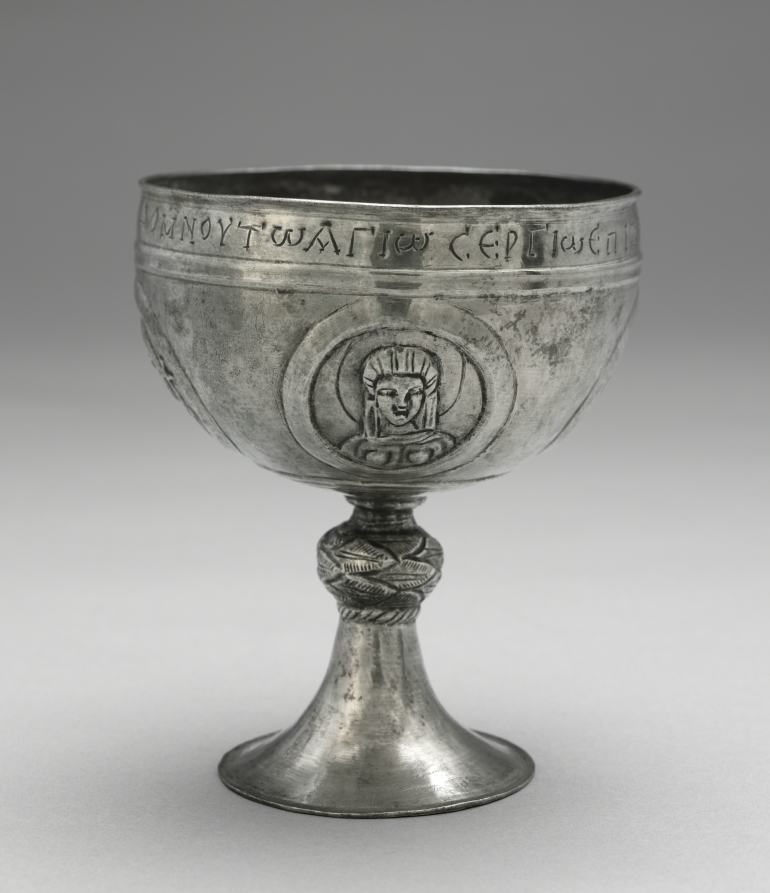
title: Chalice from the Beth Misona Treasure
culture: early Byzantium, Constantinople or Syria, Byzantine period, 6th-7th Century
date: c. 500–700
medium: silver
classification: Metalwork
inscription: the Greek inscription at the top, under an engraved line translates as: + The priest, KYRIAKOS, son of DOMNOS, (gave this chalice) to St. Sergios, in the time of Zeno the priest.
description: These four liturgical silver vessels—a paten and three chalices (1950.378–81)—form what is now called the Beth Misona Treasure, named for the village in northern Syria for which the objects were made. While nothing is known about the exact location and circumstances of the treasure's discovery, the people of the village of Beth Misona were, like other Christian communities in Syria and Palestine, probably forced to bury their church silver to hide it from the Persians or Arabs, who conquered their lands in the first half of the 600s. The paten, which held pieces of Eucharistic bread used during Mass, is decorated with an engraved Latin cross surrounded by a dedicatory inscription that names the paten's donor—Domnos—and its original location, the church of Saint Sergios in Beth Misona. The chalices, which contained the Eucharistic wine used during Mass, feature broad cups decorated with portrait busts of Saints Peter and Paul, Christ, and the Virgin. One chalice bears a dedicatory inscription naming its donor—Kyriakos, Domnos's son—and the priest of the church that received the pious gift—Zeno.